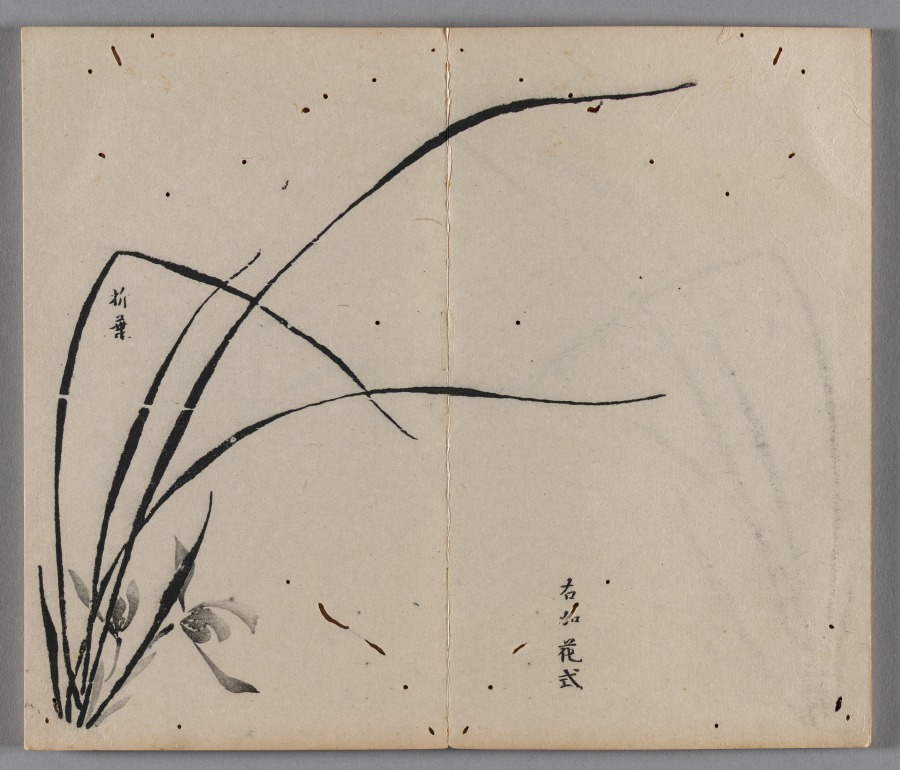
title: Ten Bamboo Studio Painting and Calligraphy Handbook (Shizhuzhai shuhua pu): Orchids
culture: China, Qing dynasty (1644-1911)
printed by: Hu Zhengyan (Chinese, c. 1584–1674)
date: 1633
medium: Woodblock-printed book; ink and colors on paper; first edition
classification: Print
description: Color printing reached a level of perfection in the early 1600s, as seen in this Ten Bamboo Studio Collection of Calligraphy and Painting and the Mustard Seed Garden Manual of Painting (printed 1679 and 1701). The painterly quality, precision in registering (aligning) the woodblocks, and harmonious colors made them the most successful color print editions in Chinese history. Both editions were printed and compiled in Nanjing, spread nationwide, and had a great impact on the arts in Japan and Korea.